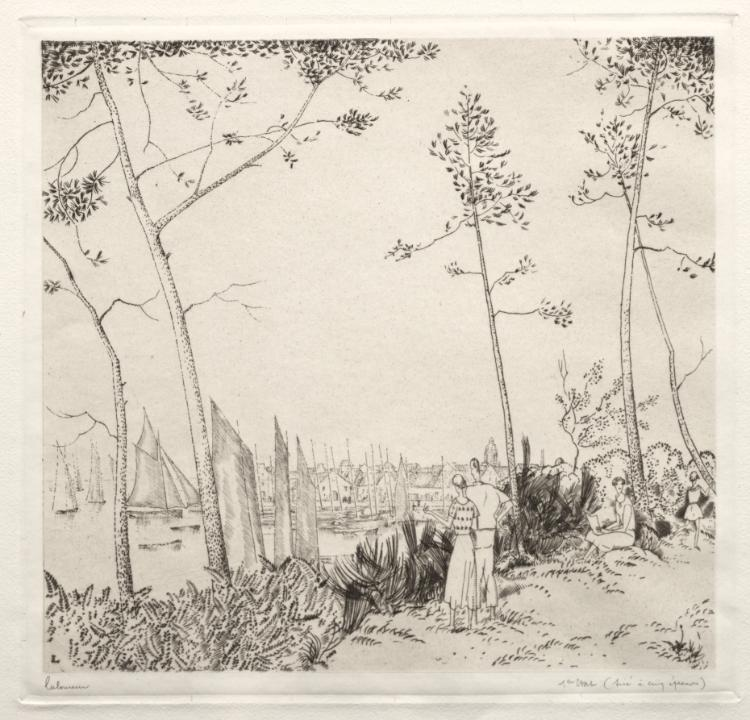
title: La Promenade sur le Port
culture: France, 20th century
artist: Jean-Émile Laboureur (French, 1877–1943)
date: 1935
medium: etching and line engraving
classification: Print